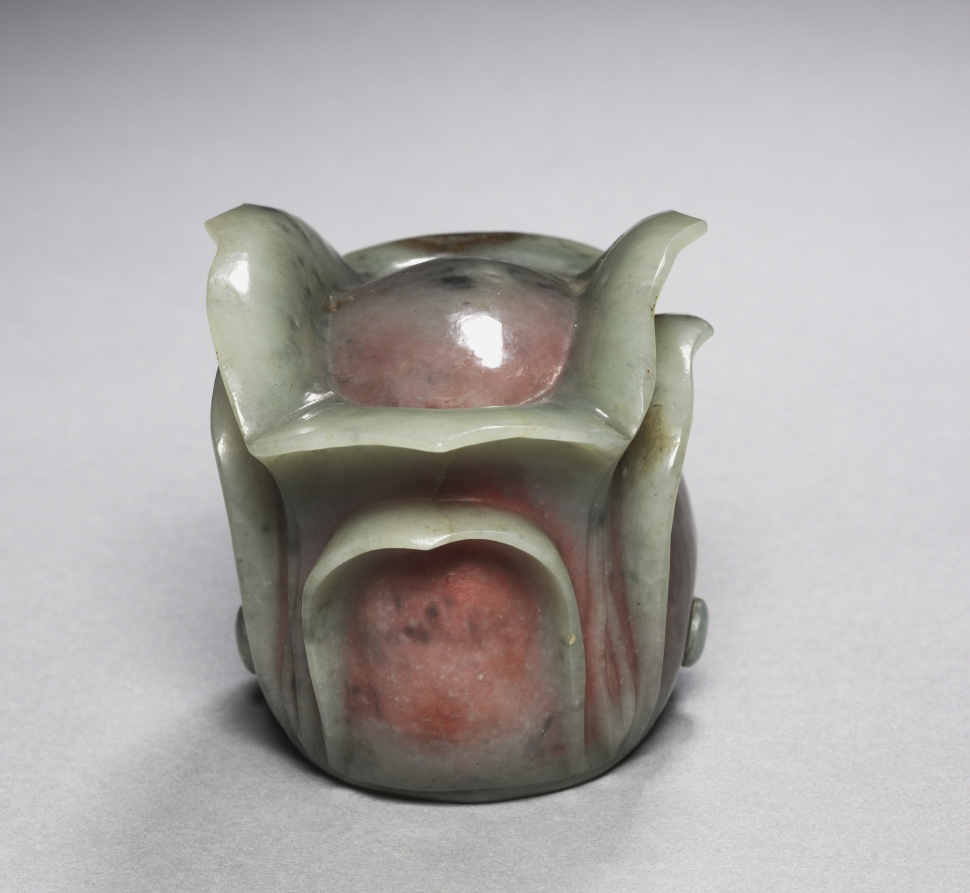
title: Daoist Cap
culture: China, Song dynasty (960-1279) - Yuan dynasty (1271-1368)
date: 960–1279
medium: grayish-green jade with brown and black markings; interior with pink pigment and gold inlays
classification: Jade